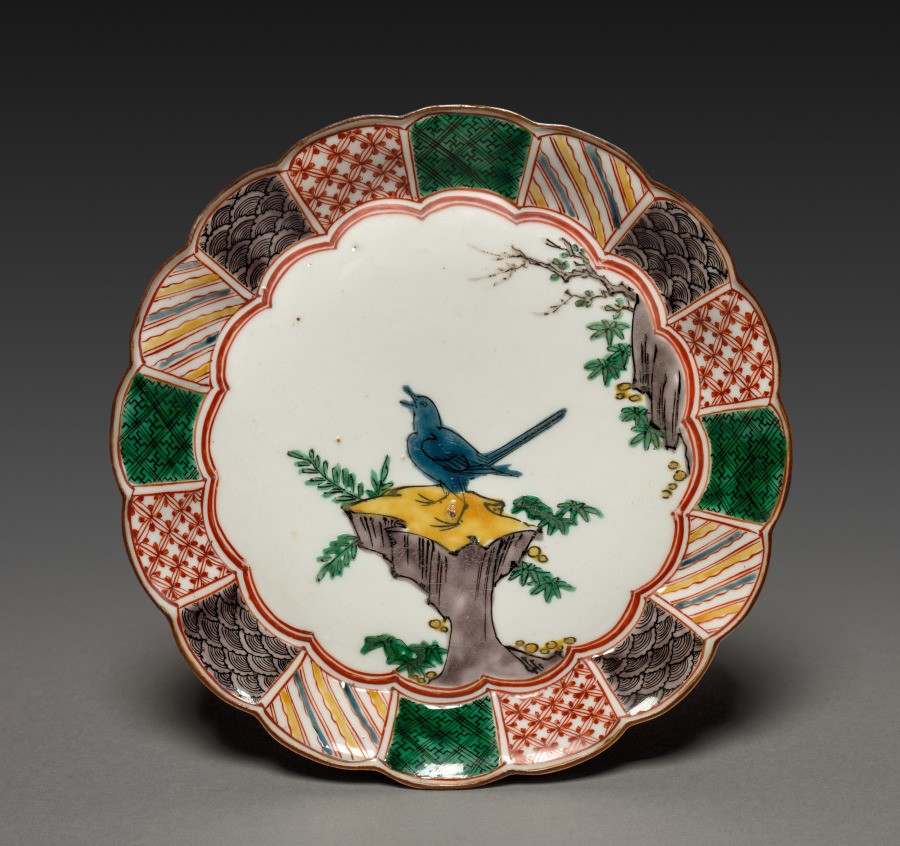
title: Dish with Singing Bird on a Rock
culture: Japan, Edo period (1615–1868)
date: 1700s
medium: porcelain with underglaze blue and overglaze color enamel (Hizen ware, Ko-Kutani style)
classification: Ceramic